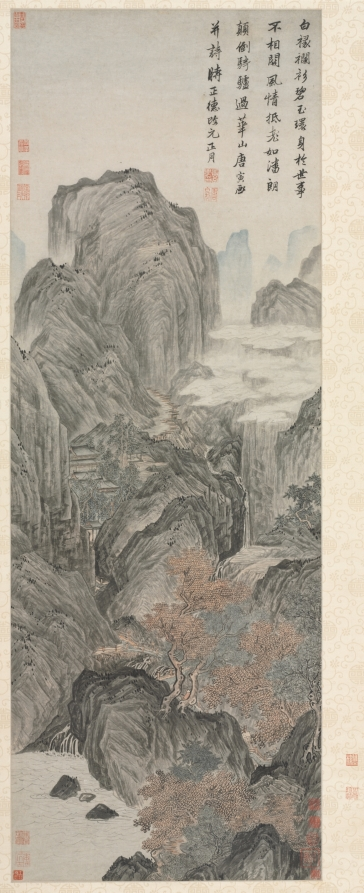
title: Mount Hua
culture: China, Ming dynasty (1368–1644)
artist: Tang Yin (Chinese, 1470–1523)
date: 1506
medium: hanging scroll; ink and light color on paper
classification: Painting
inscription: Artist's inscription, signature, and 4 seals: Wearing a white-bordered scholar's robe and green jade pendants, His life is unconcerned with worldly fame. Like P'an Lang resisting old age through high spirits, Crazy and clumsy he rides his donkey past Mount Hua. T'ang Yin painted this and composed the poem, the first month of the year of the Cheng-te era [1506]. [2 seals] T'ang Tzu-wei yin; T'ang. [2 seals, lower left corner] Po-hu T'ang Yin ssu yin; T'ang Chü-shih. trans. LYSL 12 additional seals: 2 of Wang Shan (1645-1728); 5 of Liu Shu (1759-1816); 1 of Yeh Ao (19th c.); 1 label and 2 seals of Lu Hui (1851-1920); 2 seals unidentified.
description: In this work, Tang Yin accumulates towering mountain summits in the manner of the Sung master, Li Tang, to capture the monumental presence of his subject. Tang Yin’s angular brushstrokes and ink washes of varied intensity give texture to the rocky surface and accent the play of light. Mount Hua is situated in southern Shaanxi province in North China. Hardly accessible during Tang Yin’s time, the mountains were frequented by immortality seekers to dwell or collect herbal drugs there. Tang Yin's potentially brilliant career was shattered in 1499 after he went to the capital to take the jinshi examination. He got entangled in a bribery case that caused him to spend seven years in prison. After his release, Tang returned to Suzhou, and settled on a career as a professional painter. One of Tang's few dated works, Mount Hua was painted seven years after this incident.